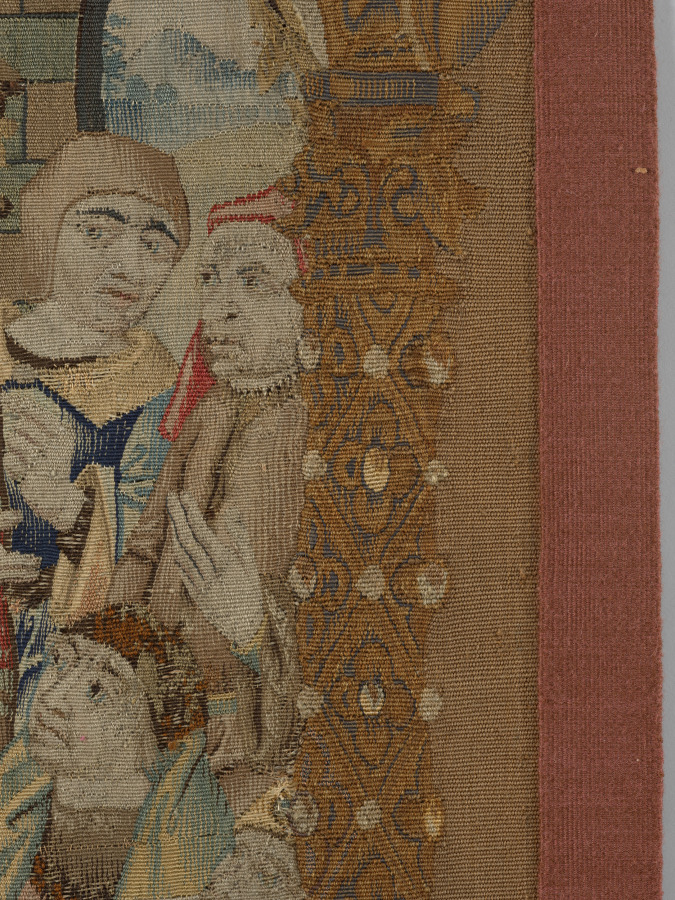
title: Altar Frontal: Scenes from the Childhood of Christ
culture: France and South Netherlands, 1500s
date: c. 1500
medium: Wool, silk, gold thread; tapestry weave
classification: Tapestry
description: Pictorial tapestries were symbols of wealth and more highly prized than paintings. Small tapestries with Christian imagery were frequently commissioned to embellish the fronts of altars. This example displays the Massacre of the Innocents, the Flight into Egypt, and Christ among the Doctors. Tapestry weave is ideal for creating narrative scenes. The technique can be compared to painting, as each colored weft (horizontal thread) is interlaced with warps (vertical thread) where needed for the pattern. As expensive investments, tapestries have the advantage of being portable and easily stored and displayed.